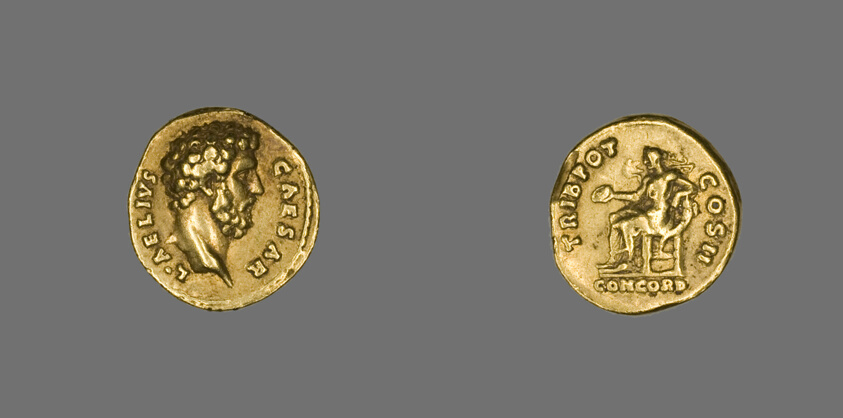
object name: Coin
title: Aureus (Coin) Portraying Lucius Aelius Caesar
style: imperial (roman), roman (ancient, style or period)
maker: Roman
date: 137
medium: Gold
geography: Rome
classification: coin; ancient art